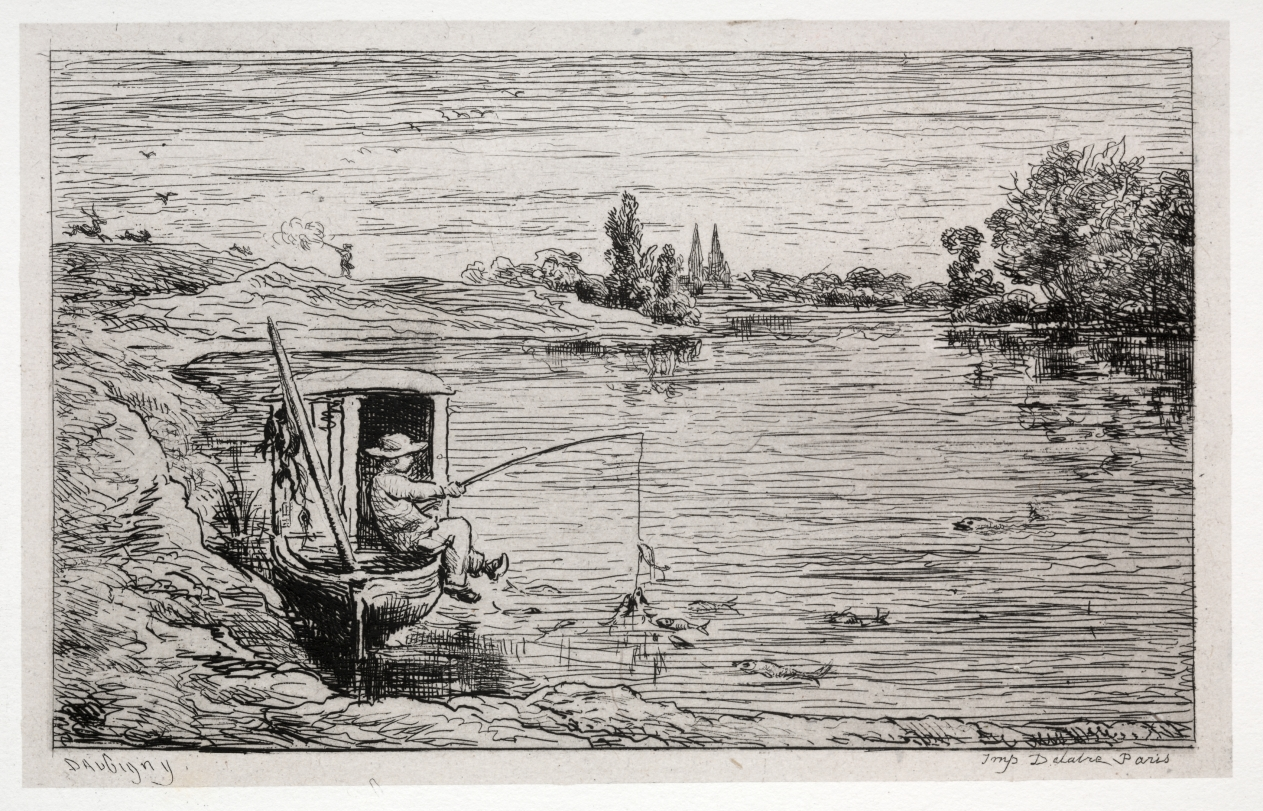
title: The Boat Trip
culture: France, 19th century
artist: Charles François Daubigny (French, 1817–1878)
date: 1861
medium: 16 etchings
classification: Portfolio